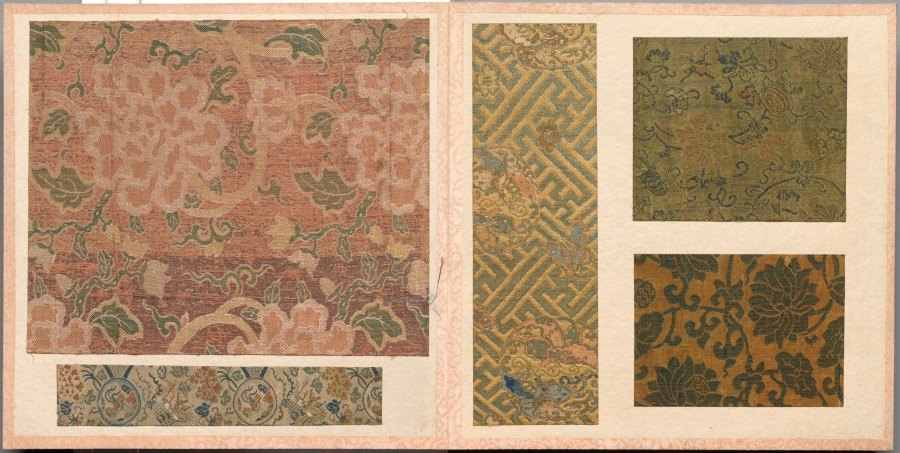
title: Album of Textile Samples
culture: Japan and China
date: 1700s–1800s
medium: silk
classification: Textile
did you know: This album contains 46 pages with 156 mounted Chinese or Japanese textile samples.